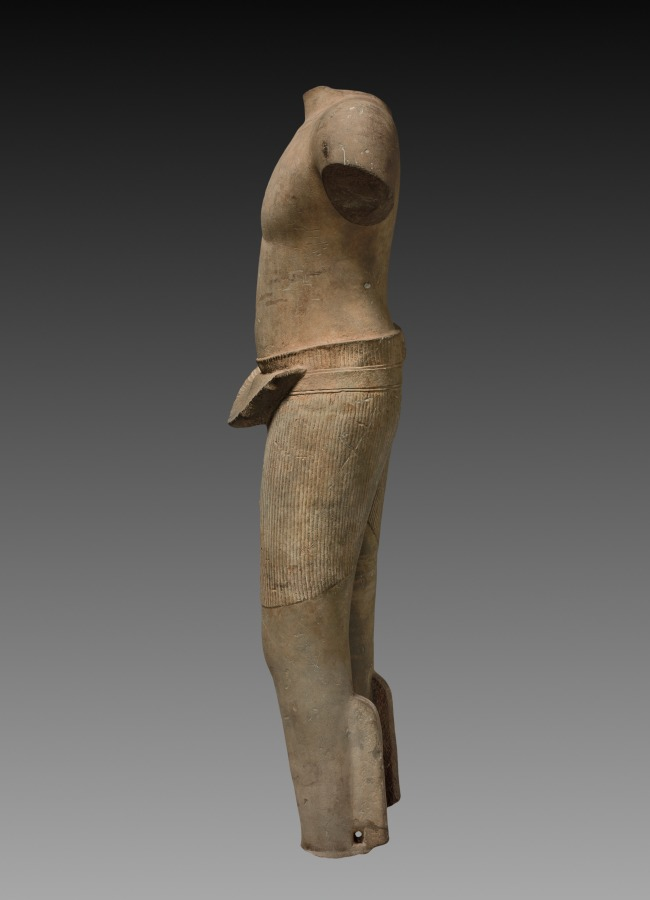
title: Male Deity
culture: Cambodia, Koh Ker-Khleong style, 10th century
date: 925–50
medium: sandstone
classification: Sculpture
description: The distinctive swath of pleated cloth and the anchor-shaped ends of the lower garment suggest that this sculpture was made when this method of wrapping the sampot was fashionable. During that time, Cambodian temples were dedicated to Hindu deities, whose images were dramatically installed alone on a pedestal in a temple's sanctum. When consecrated, gold tokens were installed under the pedestal; many sculptures were broken when people toppled them to get the gold.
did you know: This male deity seems to be striding with his left leg advanced subtly forward.